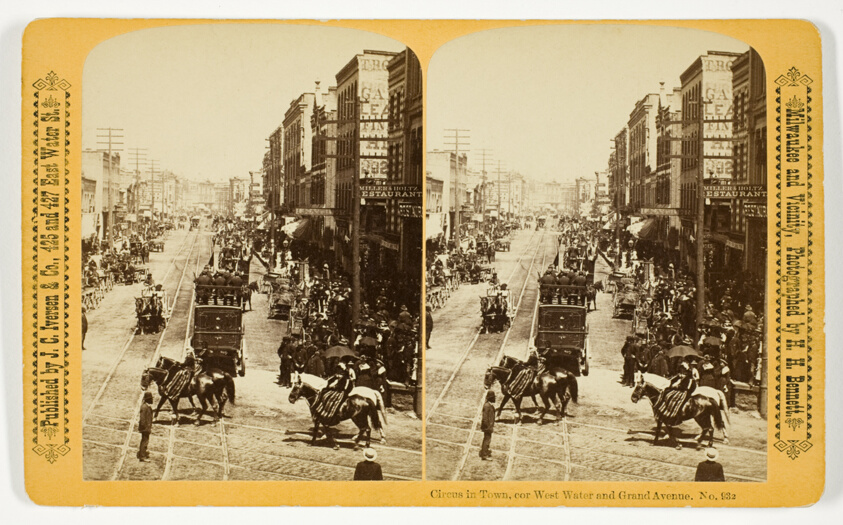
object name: Photograph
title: Circus in Town, cor West Water and Grand Avenue, No. 932 from the series "Milwaukee and Vicinity"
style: 19th century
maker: Henry Hamilton Bennett (American, born Canada, 1843-1908)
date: 1880/89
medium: Albumen print, stereo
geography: United States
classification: photography; photograph; albumen silver print; stereograph (albumen)